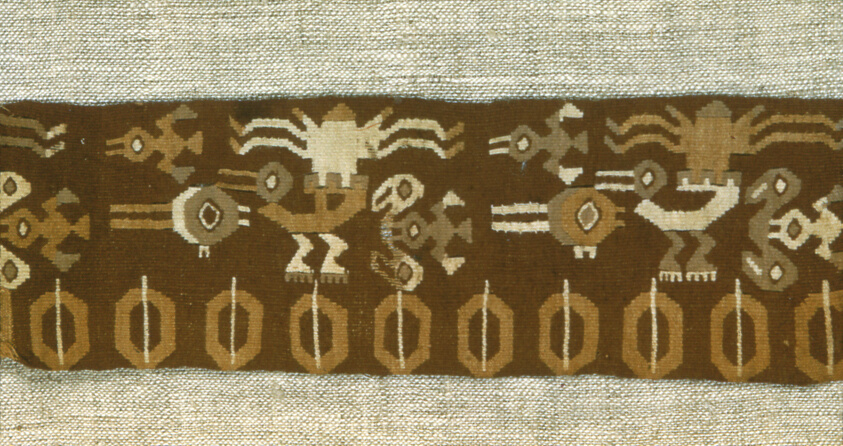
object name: Textile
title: Fragment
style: andean, andes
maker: Peru, Possibly north or central coast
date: A.D. 1000/1476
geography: Peru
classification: textile; weaving